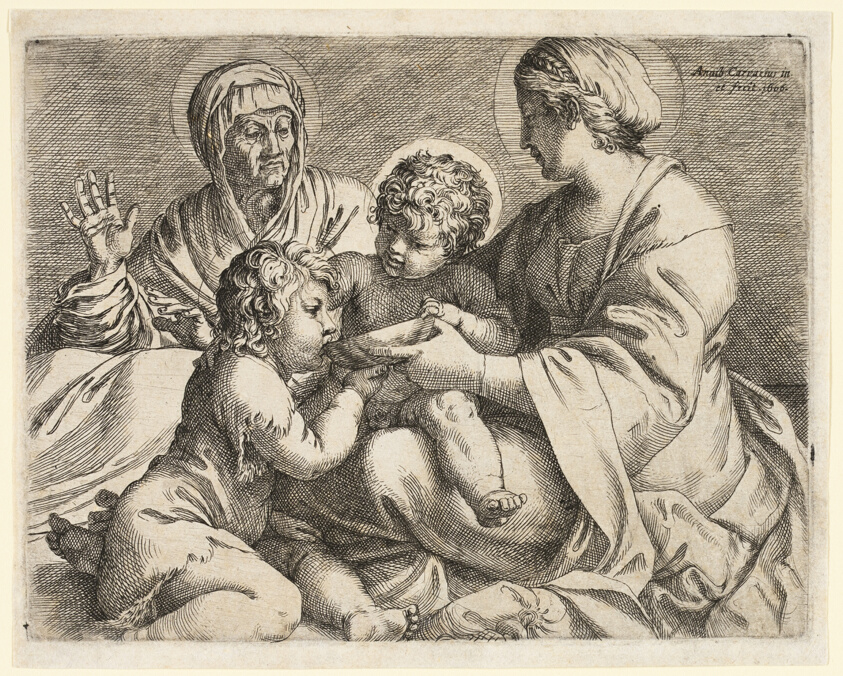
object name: Print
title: Madonna and Child with Saints Elizabeth and John the Baptist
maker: Annibale Carracci (Italian, 1560-1609)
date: 1606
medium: Engraving and etching in black on ivory laid paper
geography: Italy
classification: engraving; print; prints and drawing